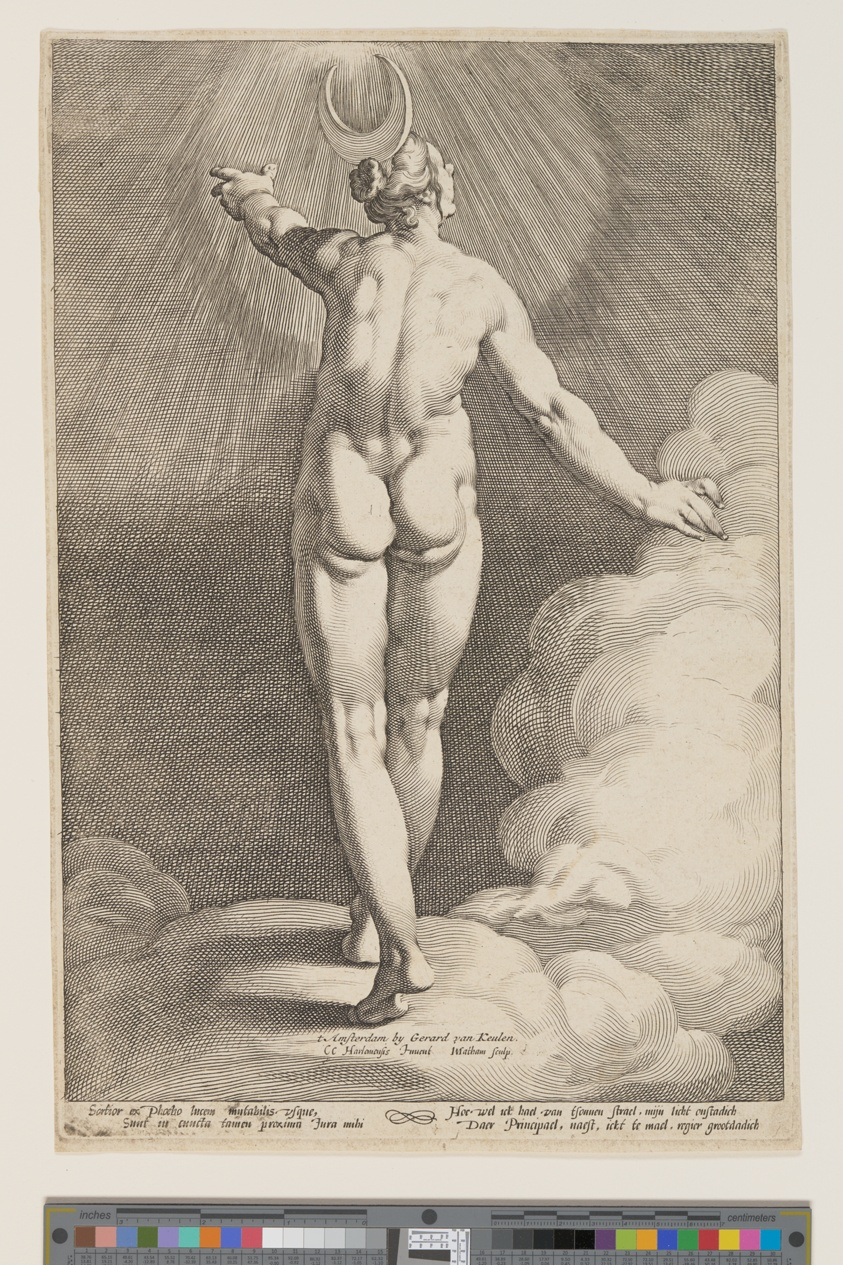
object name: Print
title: Diana in the Clouds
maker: Jacob Matham (Dutch, 1571–1631); after Cornelis van Haarlem (Dutch, 1562-1638)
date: c. 1600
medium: Engraving on ivory laid paper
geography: Netherlands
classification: print; paper; prints and drawing; engraving